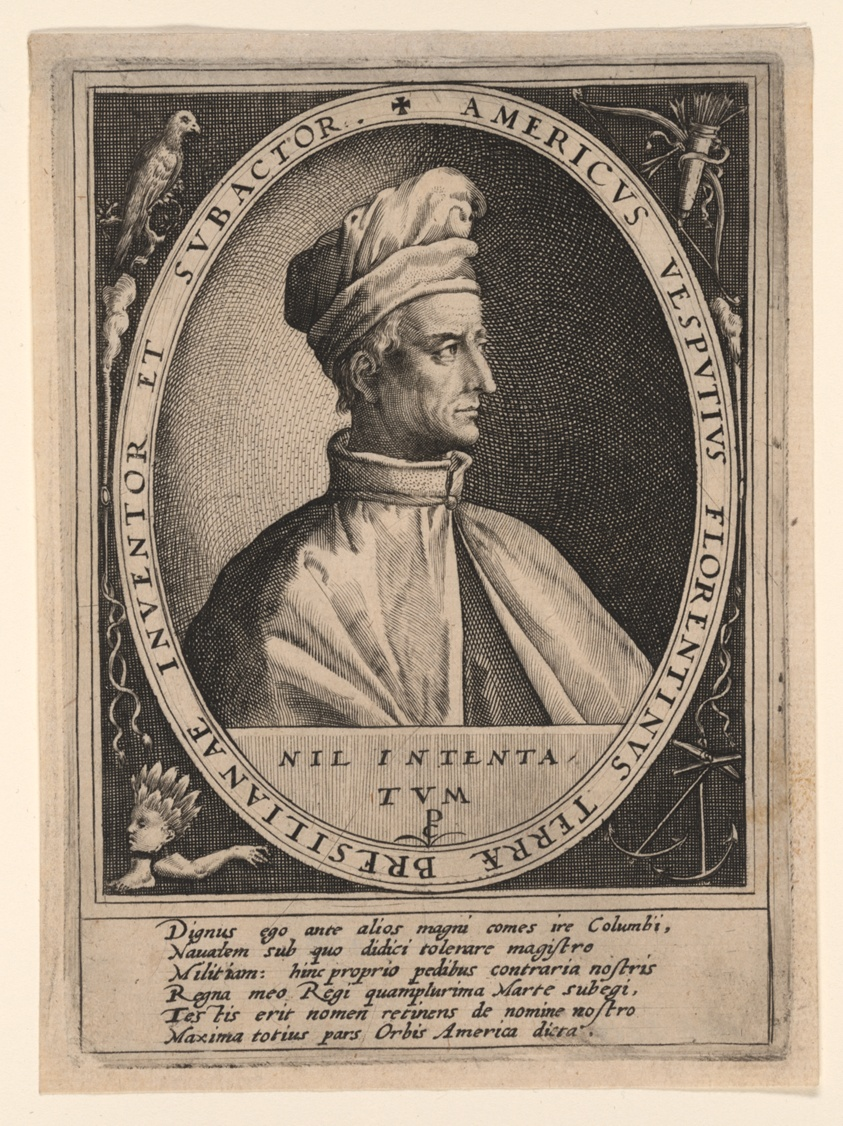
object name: Print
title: Amerigo Vespucci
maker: Crispijn van de Passe I; Dutch, c. 1565–1637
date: 1590/1600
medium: Engraving on paper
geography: Netherlands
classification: engraving; paper; print; prints and drawing